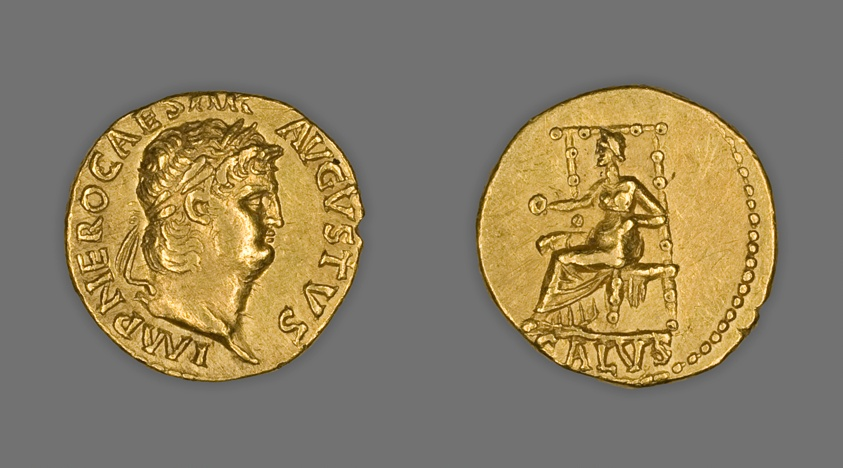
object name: Coin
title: Aureus (Coin) Portraying Emperor Nero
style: imperial (roman), ancient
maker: Roman; minted in Rome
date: 66 (December)-67 (December), issued by Nero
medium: Gold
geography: Rome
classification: coin; ancient art